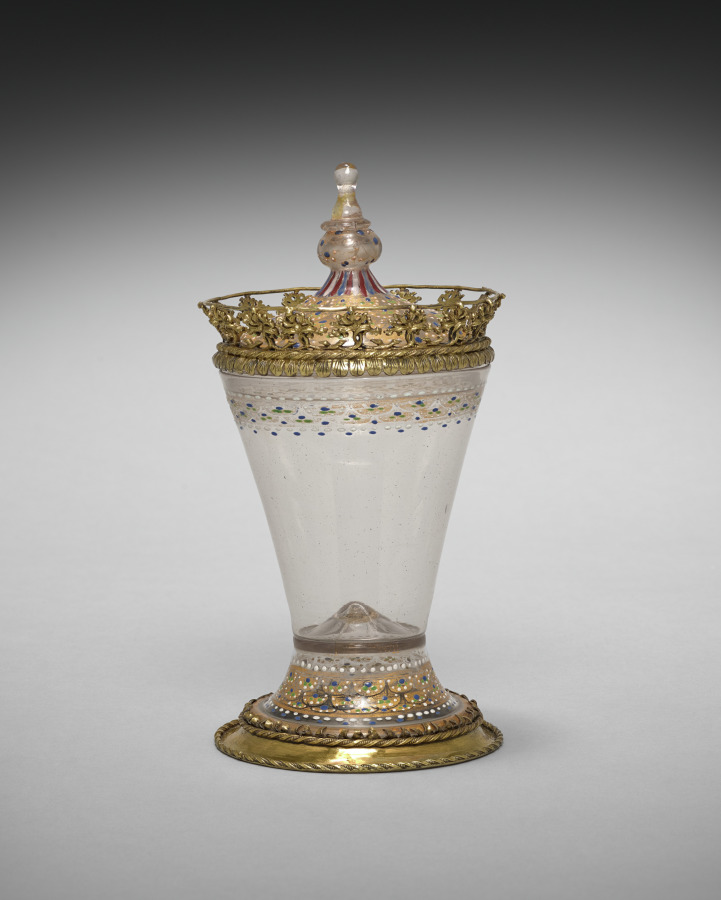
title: Covered Beaker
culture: Italy, Venice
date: c. 1490–1500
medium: glass, enameled and gilded, gilt-silver mounts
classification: Glass